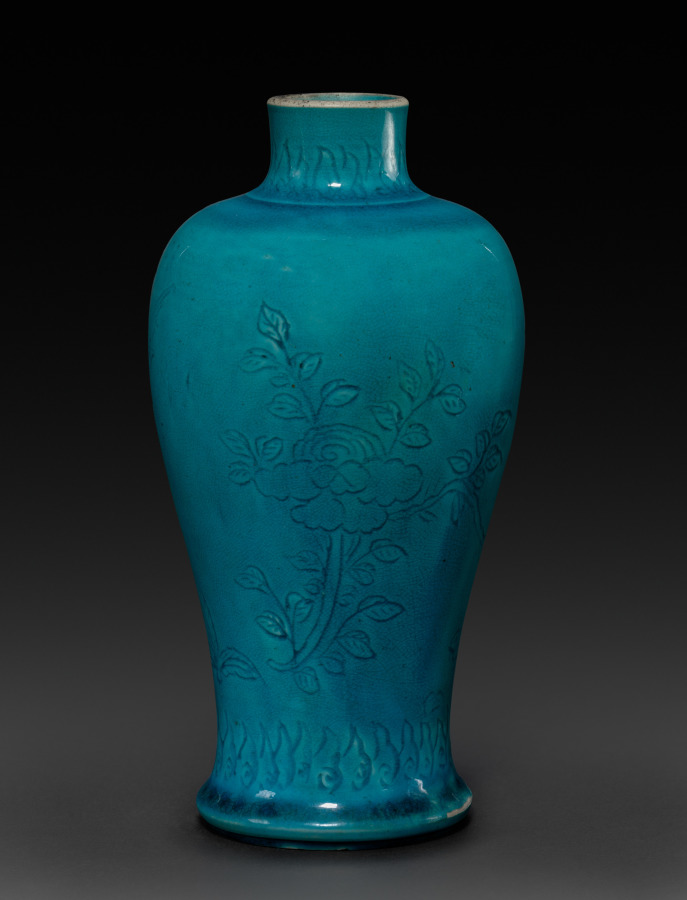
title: Vase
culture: China, Qing dynasty (1644-1911), Kangxi reign (1662-1722)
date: 1662–1722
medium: porcelain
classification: Ceramic